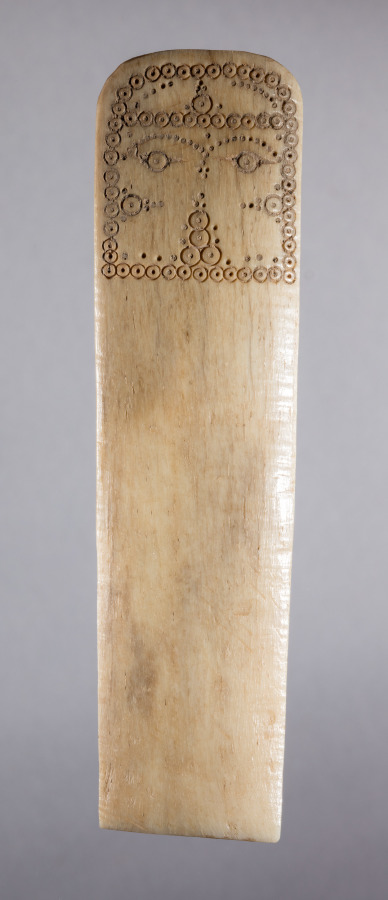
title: Figurine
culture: Iran, early Islamic period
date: 700s - 900s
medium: bone, incised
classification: Miscellaneous